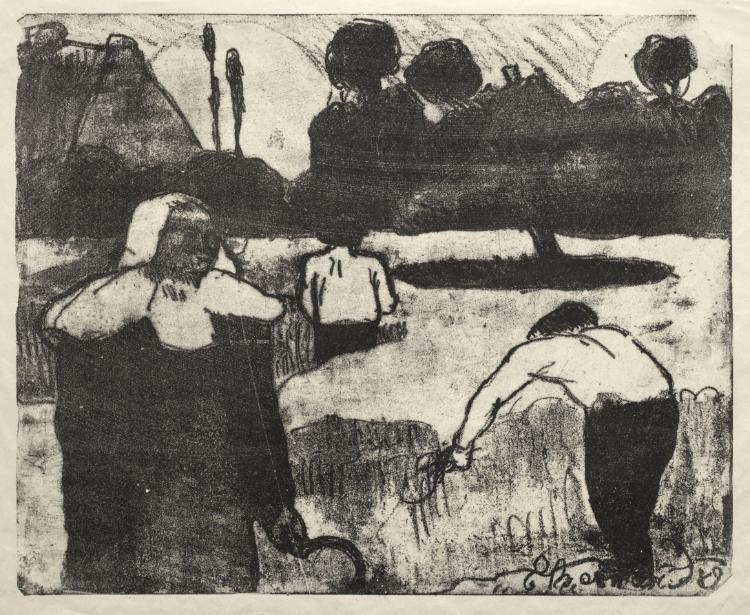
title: Les Bretonneries: The Harvesters (Les Moissonneurs)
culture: France, 19th century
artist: Émile Bernard (French, 1868–1941)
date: 1889, printed 1896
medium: zincograph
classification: Print